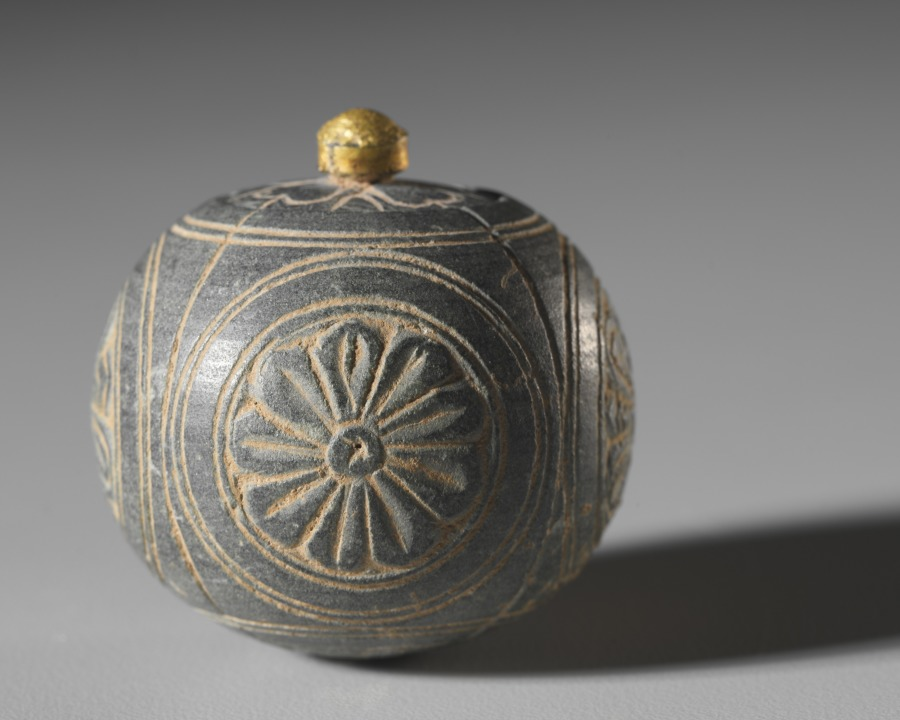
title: Miniature Stone Reliquary or Toilette Casket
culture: Pakistan, Gandhara, probably Sirkap, early Kushan period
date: 1–100 CE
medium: gray schist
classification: Sculpture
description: Tiny reliquaries holding the cremated remains of the Buddha or a high-ranking holy person empowered monuments and made them sacred. A Buddhist monument, such as the solid hemispherical mounds called stupas, would not be worshipped until it was consecrated with the relic secreted inside. Bits of ash were combined with tiny gems inside a crystal or glass reliquary, which was then placed inside a stone or metal container, like the lidded versions seen here. These containers look like cosmetic vessels for aromatic pastes used for perfume in ancient India. Buddhist texts state that the enlightened Buddha emitted a fragrance like sandalwood paste; the form of the reliquary as a perfume bottle indicates the presence of the Buddha by the visual reference to his pleasant scent. Once enclosed in the stupa the reliquaries would not be seen, but monks were tasked with applying sandalwood paste to the exterior of stupas as part of their regular maintenance to convey to visitors the ongoing presence of the Buddha radiating from the relic in the center.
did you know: The knob of the lid is gilded, as is the interior of the casket.